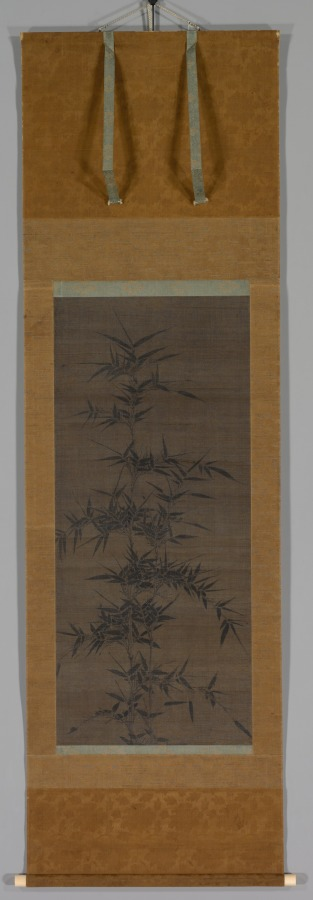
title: Ink Bamboo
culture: China, Southern Song dynasty (1127-1279)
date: 1200s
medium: hanging scroll; ink on silk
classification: Painting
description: This deceptively simple composition features two upright stalks of bamboo with leafy stems extended to fill the silk. The painter sensitively balanced ink tones and brushstrokes. The leaves that cross in front of other leaves are outlined in clear silk.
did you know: In traditional Chinese culture, bamboo symbolizes a gentleman's virtuous resilience and flexibility.